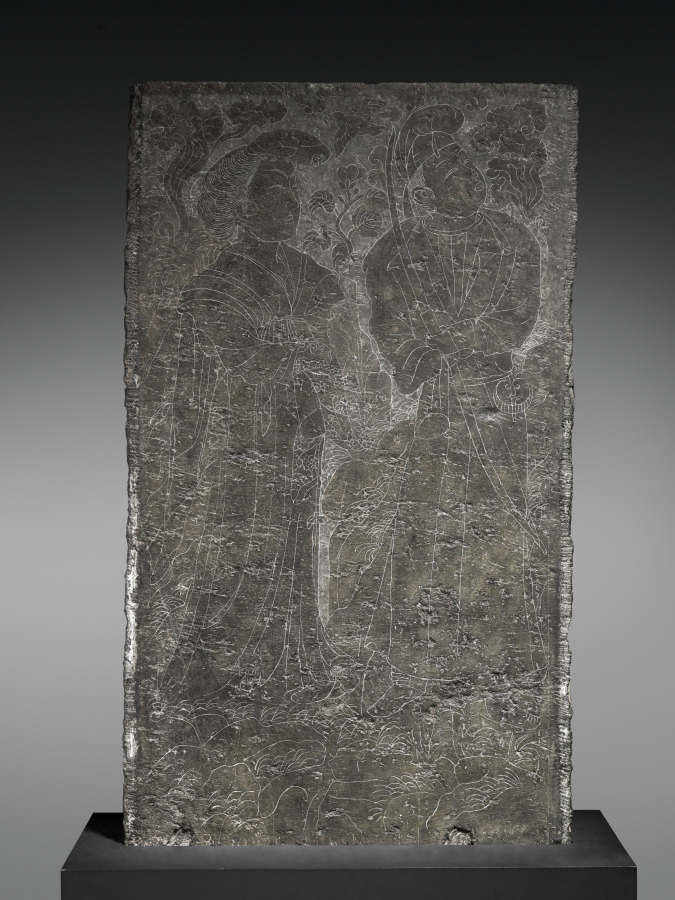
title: Sarcophagus Panel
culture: China, Tang dynasty (618-907)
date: early 700s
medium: limestone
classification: Sculpture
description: This slab originally formed the "window" panel of a coffin encasement constructed to resemble a one-story house. The dwarfs bowing respectfully under the vertical lattice window, as well as the court lady and archer engraved on the reverse, reflect the style of contemporary figure painting. Complete structures with similar décor have been excavated from tombs in the Tang imperial cemetery near Xian in northwest China.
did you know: The two sides of the stone were engraved during the Tang dynasty, but the court lady and archer were likely carved 50 years later.